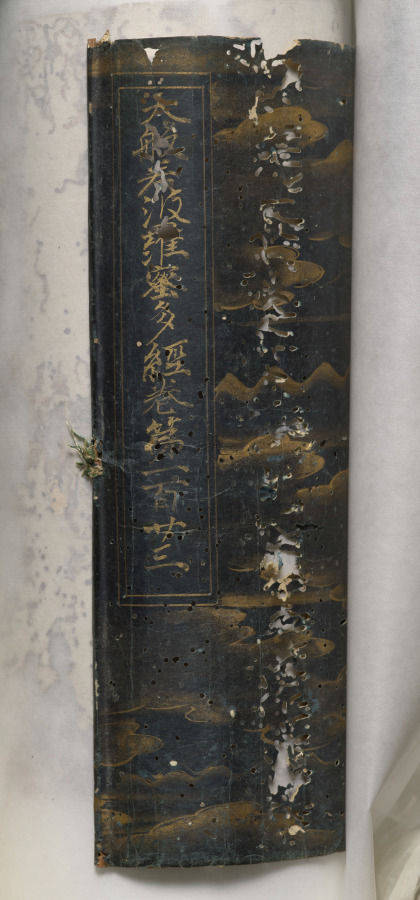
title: Volume from the Great Perfection of Wisdom Sutra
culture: Japan, Heian period (794–1185)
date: late 1100s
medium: Handscroll; ink and gold on dyed paper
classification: Manuscript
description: This scroll is part of the 600-volume Great Perfection of Wisdom Sutra. The sacred text addresses the perfection of wisdom and the nonsubstantiality of all phenomena, or the emptiness of all things. It takes the form of Shakyamuni Buddha’s preaching at four locations. This scroll is from the Perfection of Wisdom in 100,000 Lines, which occupies the first 400 volumes. At one time, religious clergy kept all the scrolls in a lacquered wood repository on view nearby. They are now too fragile to open and we will conserve them over time.